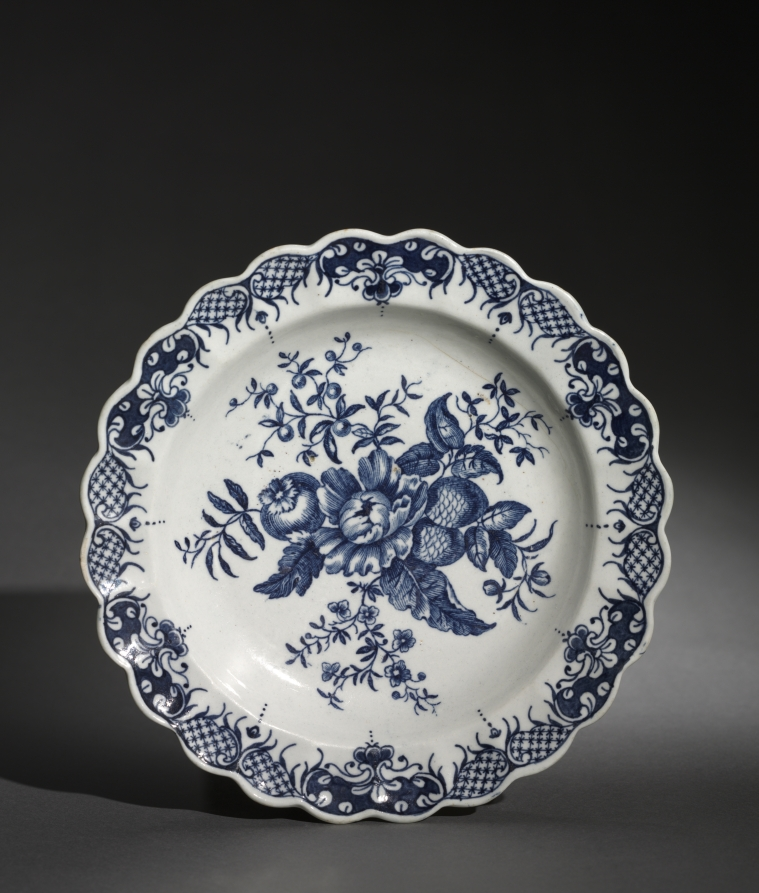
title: Plate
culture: England, Worcester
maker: Worcester Porcelain Factory (British, established 1751)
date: c. 1750–70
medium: porcelain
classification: Ceramic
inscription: half moon mark on the bottom.